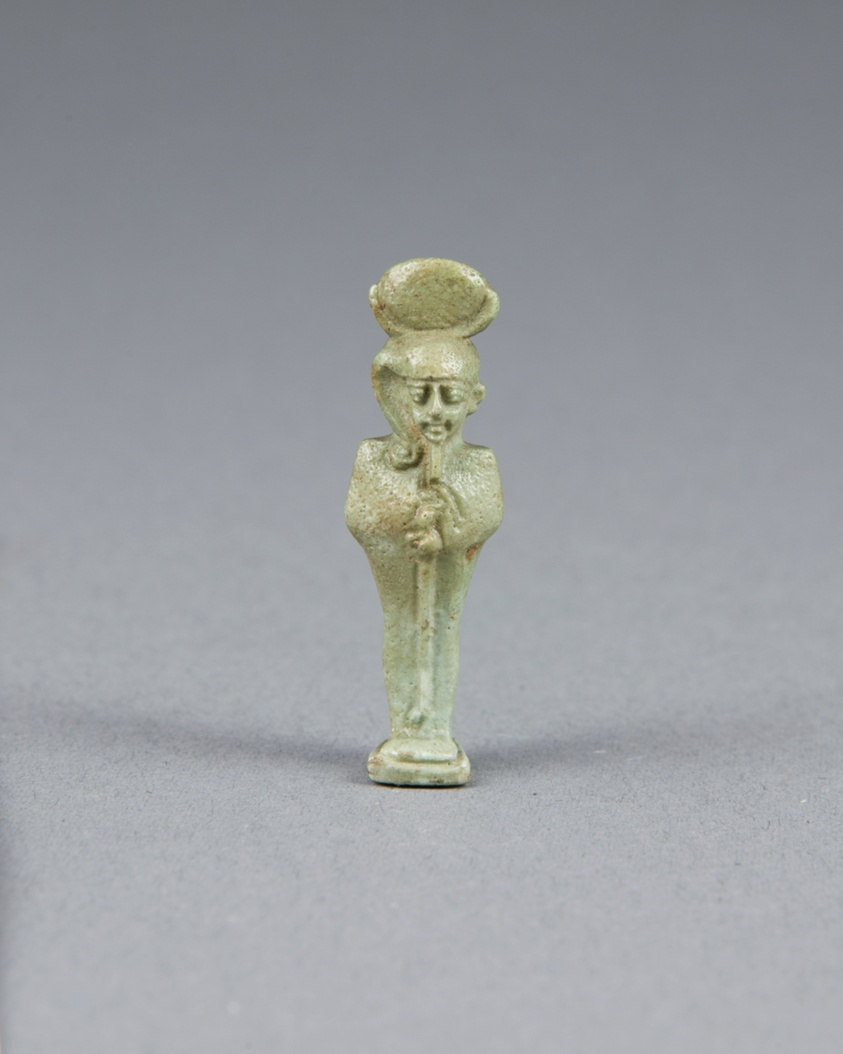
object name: Costume and Accessories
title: Amulet of Mummiform Khonsu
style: egyptian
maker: Egyptian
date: Late Period, Dynasties 26–31 (664–332 BCE)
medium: Faience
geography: Egypt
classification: amulet; jewelry; ceramics; ancient art; costume; faïence (composite material)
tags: gods (deities)